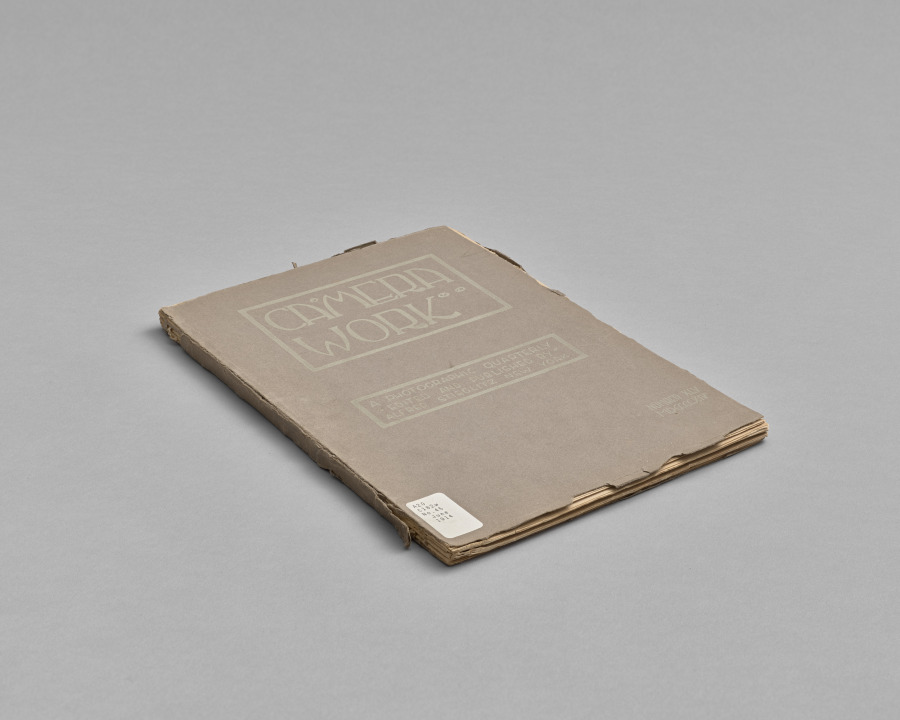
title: Camera Work: Number 45, January 1914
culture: England, 20th century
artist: J. Craig Annan (British, 1864–1946)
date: 1914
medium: photogravure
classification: Bound Volume